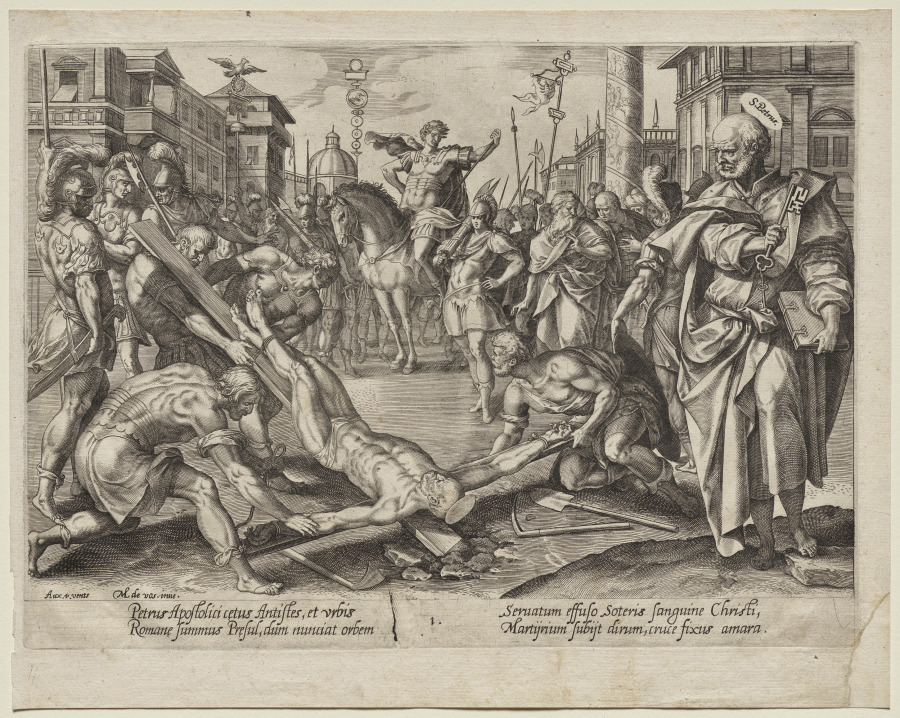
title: St. Peter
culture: Netherlands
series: Christ, St. Paul, and the Twelve Apostles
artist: Hendrick Goltzius (Dutch, 1558–1617)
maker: after Maarten de Vos (Flemish, 1532–1603)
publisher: Aux Quatre Vents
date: c. 1578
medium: engraving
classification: Print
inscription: Aux.4.vents and M.de vos inue bottom left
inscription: Verses in lower margin: Petrus Apostolici…cruce fixus amara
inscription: In Nimbus S. Petrus. Numbered 1